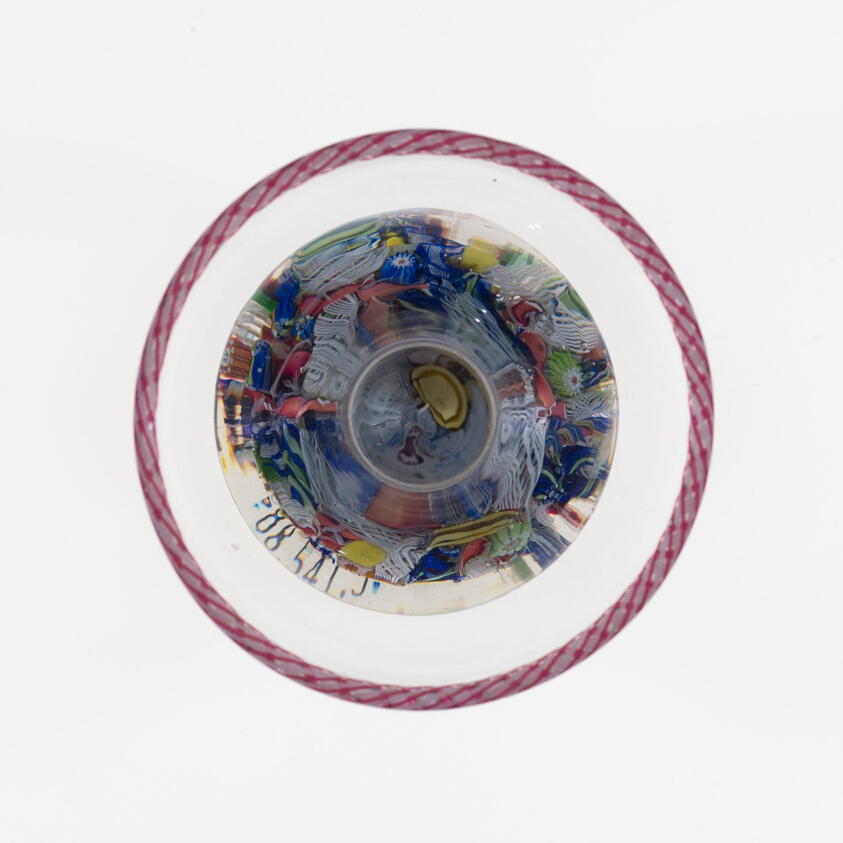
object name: Glass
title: Sealing-wax wafer stand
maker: Saint-Louis Glassworks (Cristalleries de Saint-Louis); Lorraine, France, founded 1586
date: c. 1845–60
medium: Glass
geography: Saint-Louis-lès-Bitche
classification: paperweight; glass